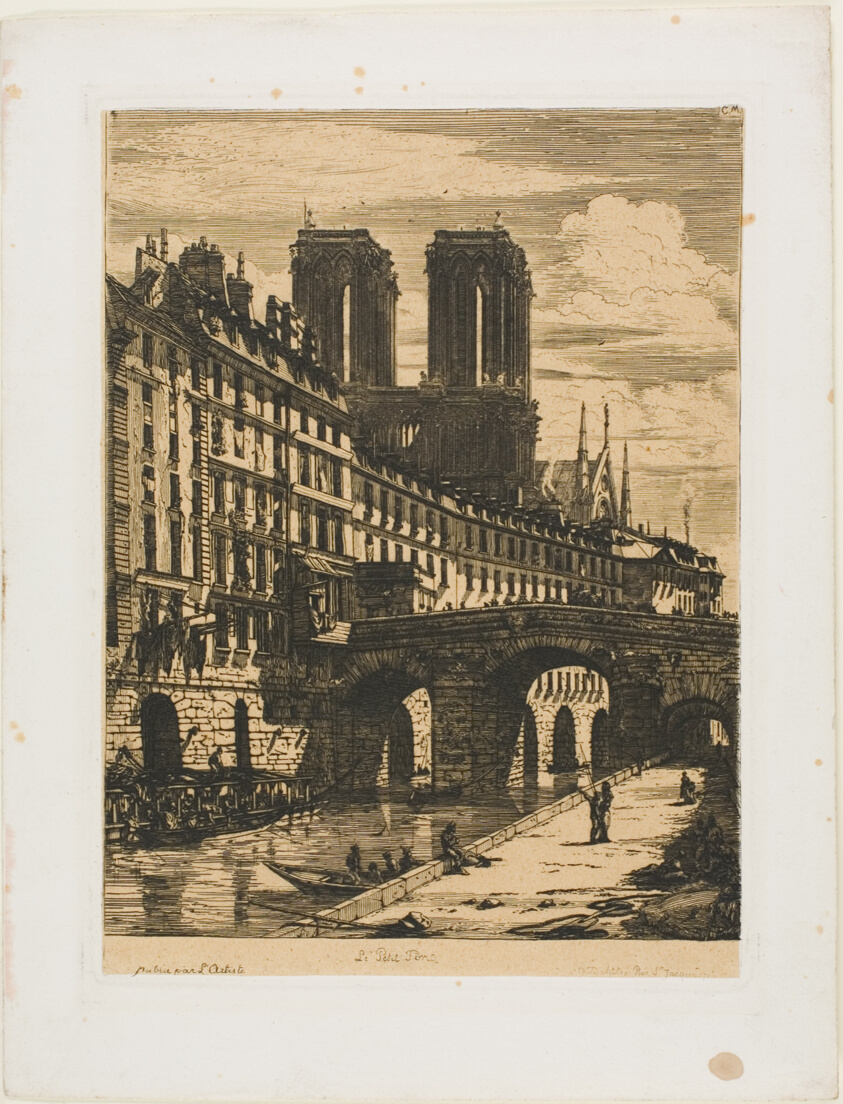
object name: Print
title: Le Petit Pont, Paris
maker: Charles Meryon (French, 1821-1868); printed by Auguste Delâtre (French, 1822-1907)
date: 1850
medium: Etching and engraving on tan wove chine, laid down on ivory wove paper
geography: France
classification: etching; print; prints and drawing